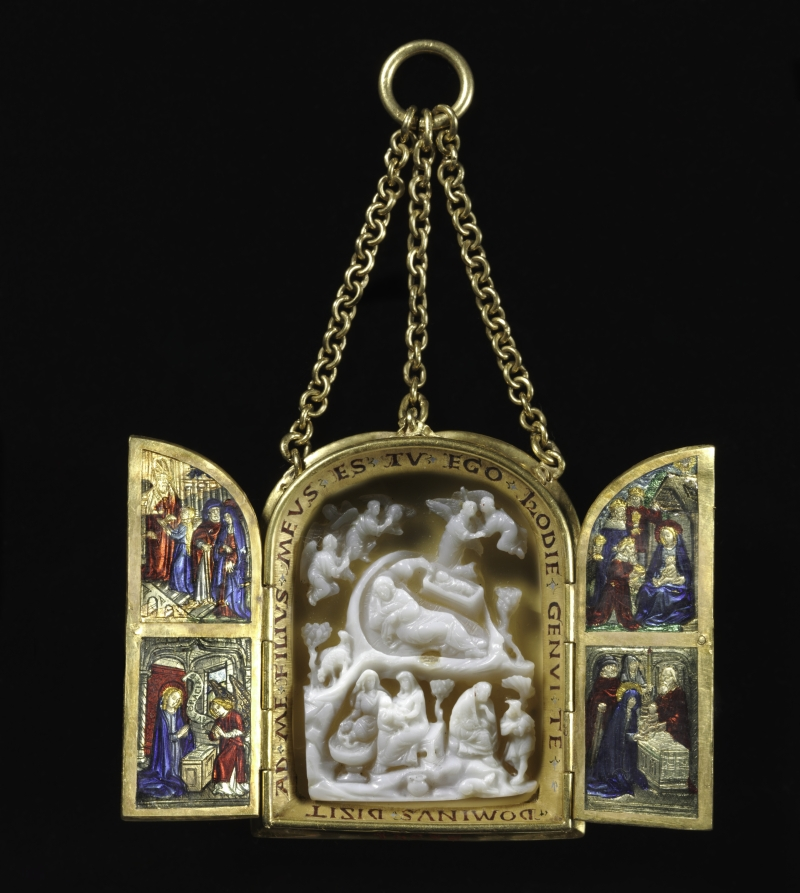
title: Pendant Triptych with an Onyx Cameo of the Nativity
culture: Pendant: France, Paris or Tours; Cameo: Italy, 13th-15th century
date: c. 1460–1500; cameo: c. 1250–1300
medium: basse-taille enamel on gold; onyx cameo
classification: Enamel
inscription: on the outside shutters, the two Prophets hold scrolls with inscriptions on them.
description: This pendant consists of colorful translucent enamel over an incised gold ground, a technique known as basse-taille, which simulates stained glass. For its owner this pendant was both for private devotion and a deluxe accessory. Made to be worn around the neck or suspended on a bed curtain, the pendant is shaped as a miniature triptych (three-panel painting) with wings or shutters that could be opened and closed. The outer surfaces are decorated with two prophets. The remaining images include various scenes from the life of Christ. Small objects played a key role in private piety. Within this domain of personal spirituality, images were used to venerate and invoke Christ and his saints, as well as to meditate on the most important mysteries of faith or events from the story of salvation. Pious men and women began outfitting rooms in their homes where "one can pray well." Small portable deluxe objects such as ivories, enamel plaques, and jeweled pendants were critical ingredients in this experience of faith.